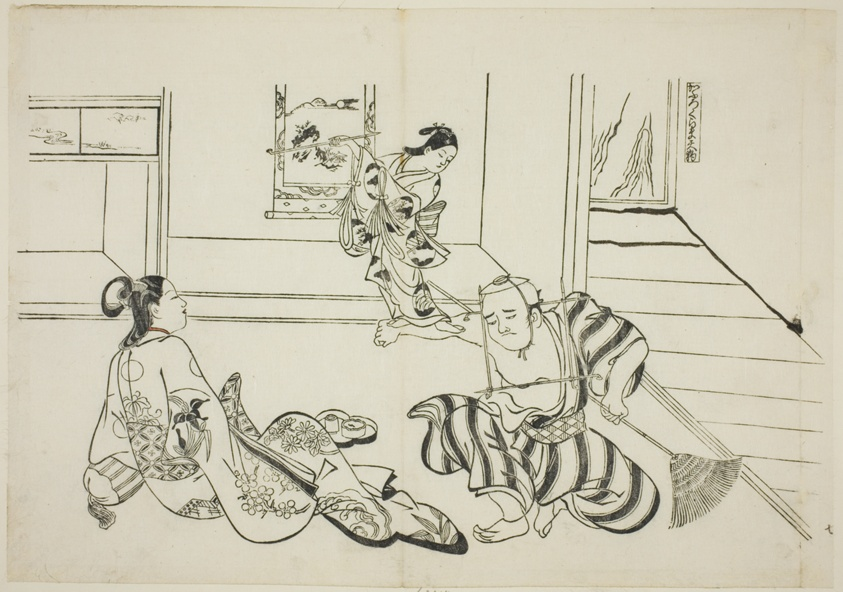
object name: Print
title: Child Attendant and Bald Tengu of Mt. Kurama (Kaburo Kurama Tengu), no. 7 from a series of 12 prints depicting parodies of plays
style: Japanese (culture or style)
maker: Okumura Masanobu (Japanese, 1686-1764)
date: c. 1716/35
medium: Hand-colored woodblock print; oban, sumizuri-e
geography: Japan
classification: woodblock print; print; asian art